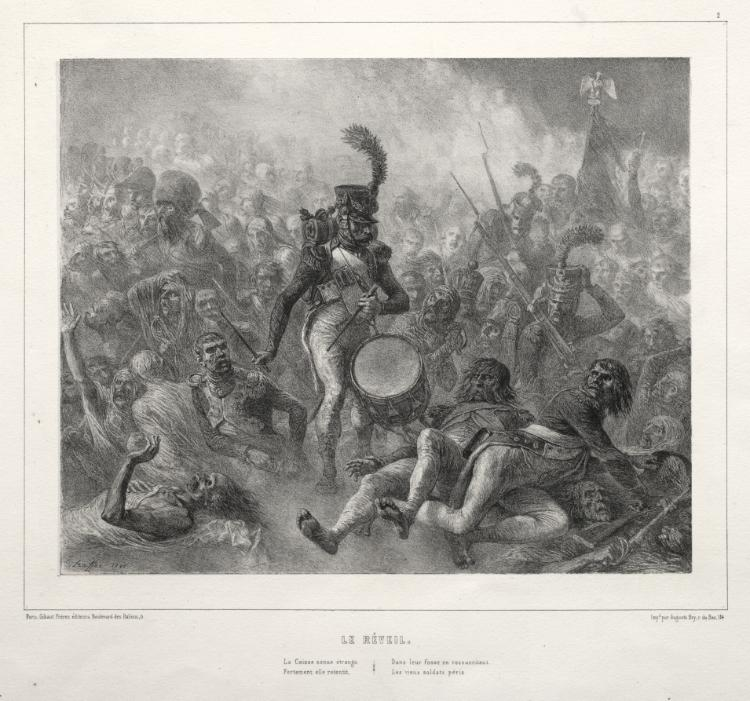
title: L'Album de 1832: Reveil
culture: France, 19th century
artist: Auguste Raffet (French, 1804–1860)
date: 1832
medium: lithograph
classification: Print